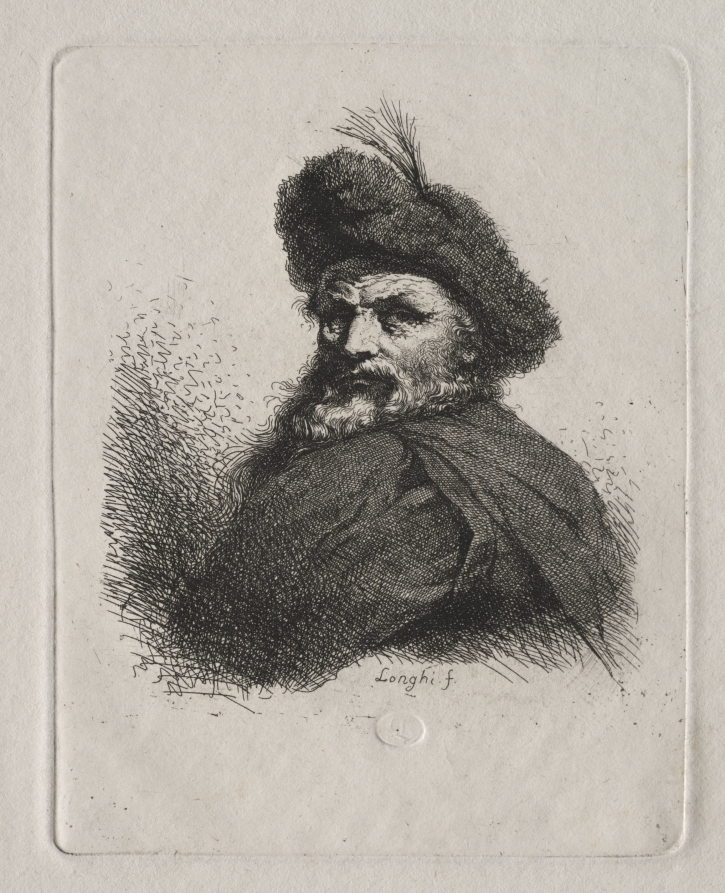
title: Bust of a Man with a Fur Cap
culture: Italy, late 18th-early 19th century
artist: Giuseppe Longhi (Italian, 1766–1831)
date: early 1800s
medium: engraving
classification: Print